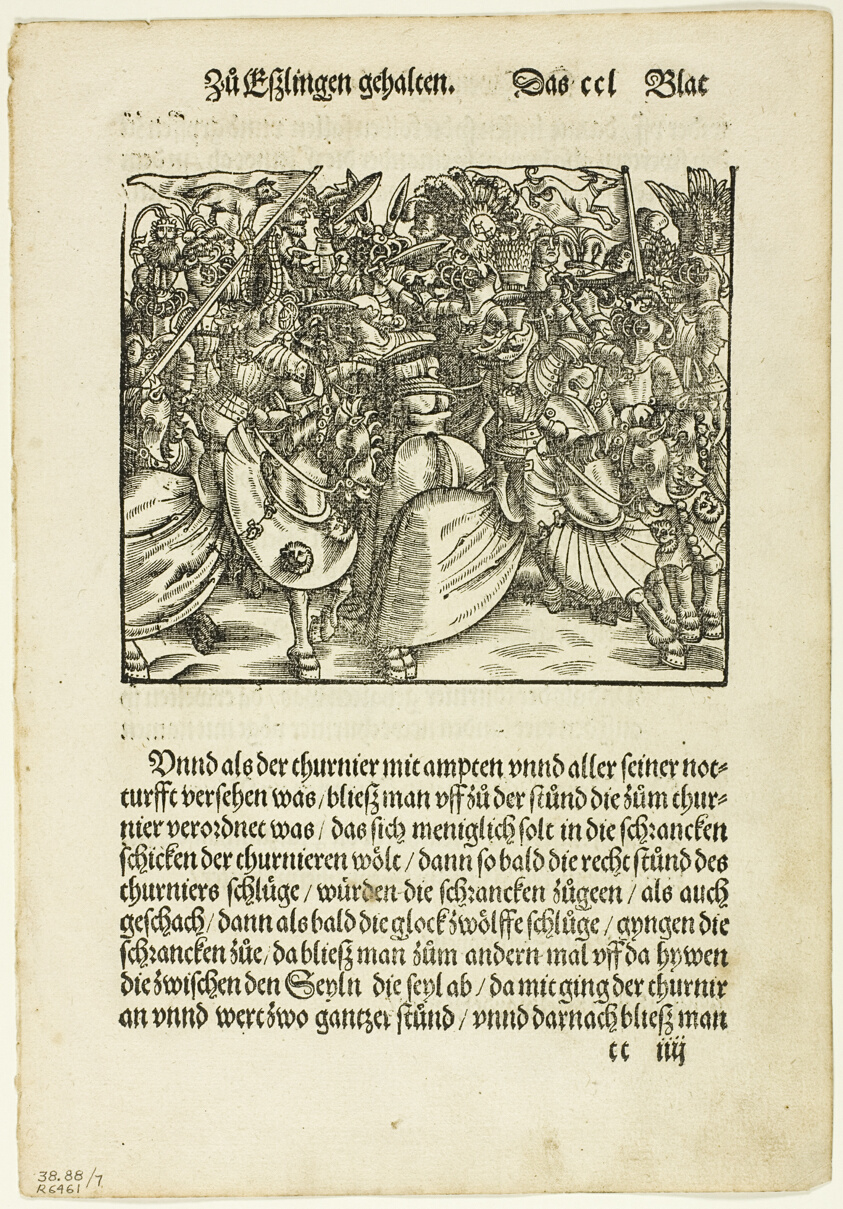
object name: Print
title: Illustration from Turnierbuch (Tournament Book), plate seven from Woodcuts from Books of the XVI Century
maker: Attributed to Monogrammist H.H. (German, active 1539-1559); assembled by Max Geisberg (Swiss, 1875-1943)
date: 1530, assembled into portfolio 1937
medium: Woodcut on paper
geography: Germany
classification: woodcut; print; prints and drawing